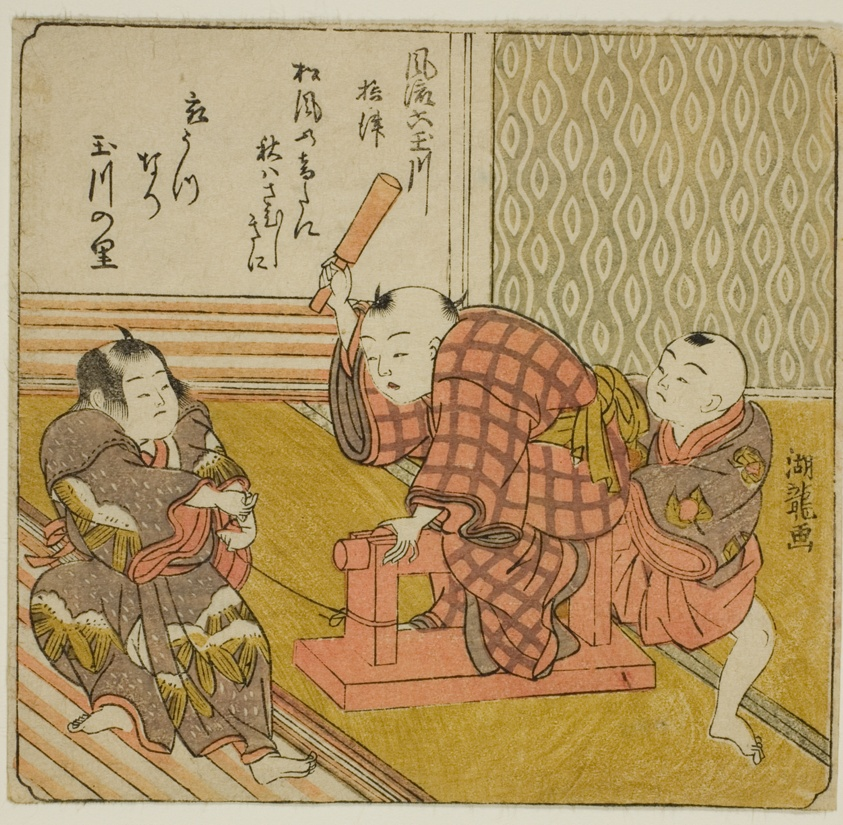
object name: Print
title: Settsu, from the series "Fashionable Six Jewel Rivers (Furyu Mu Tamagawa)"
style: Japanese (culture or style)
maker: Isoda Koryusai (Japanese, 1735-1790)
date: c. 1772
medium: Color woodblock print; koban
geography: Japan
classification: woodblock print; print; asian art